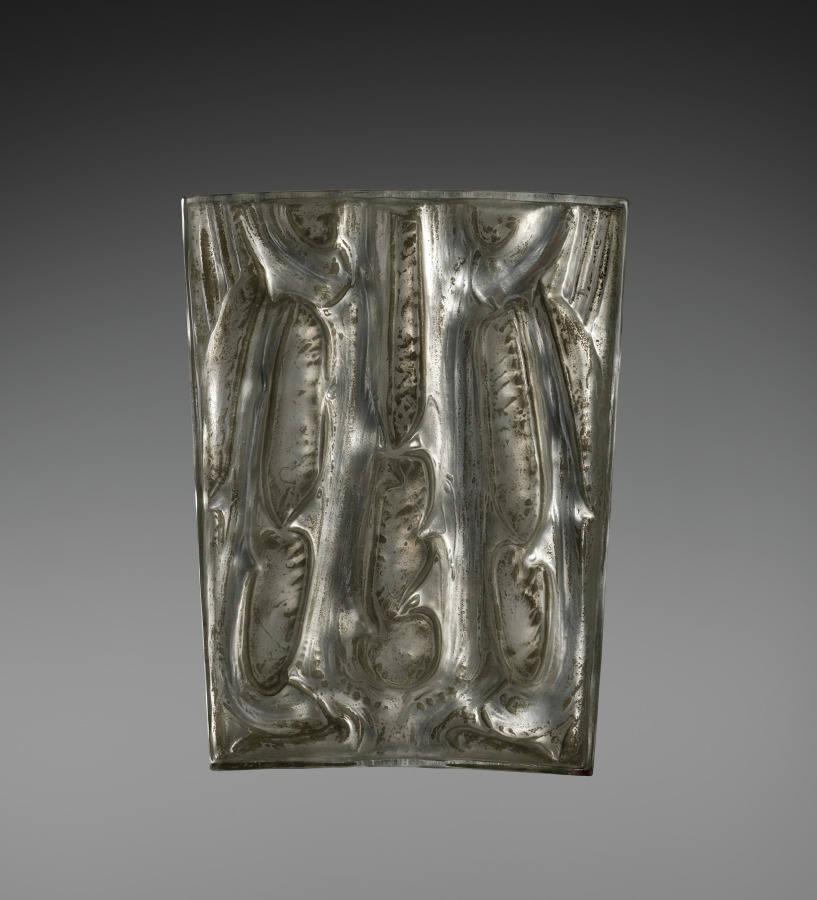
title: Section of the Two Pigeons Panel (Panneau deux pigeons)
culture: France, 20th century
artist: René Lalique (French, 1860–1945)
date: 1914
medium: molded glass with mirrored backplate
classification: Glass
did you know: The title of this work translates to curved panels with two pigeons.